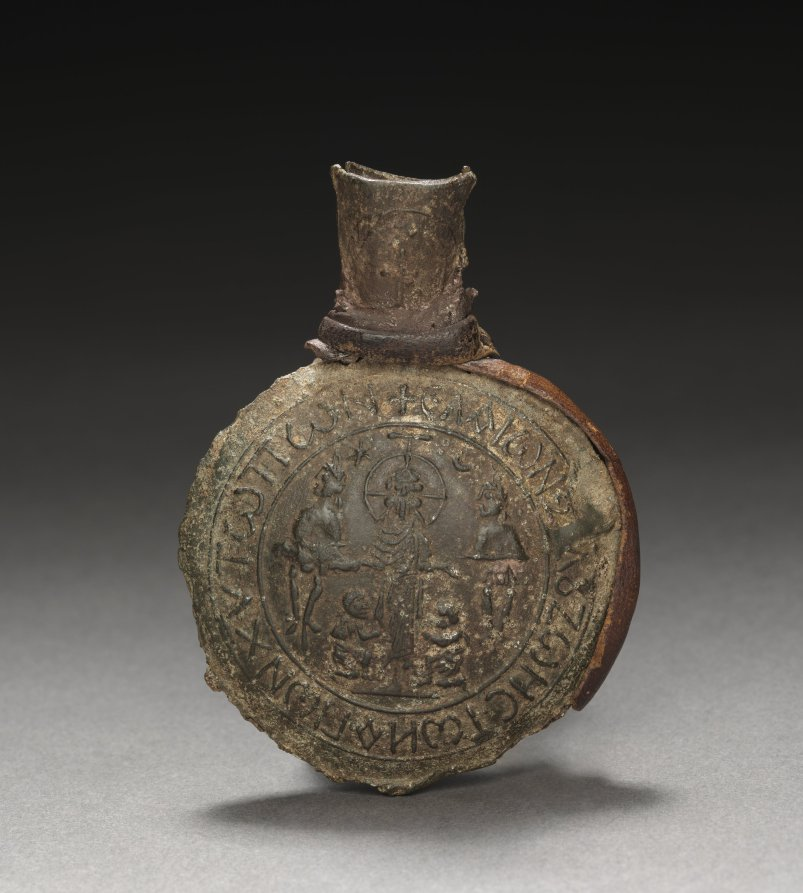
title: Pilgrim's Ampulla with the Crucifixion (front)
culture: Byzantium, Palestine, early Byzantine period, early 7th Century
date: c. 600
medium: tin-lead alloy with leather fragments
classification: Metalwork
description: The images found on the sides of surviving lead pilgrims' ampullae include scenes relating to the life of Christ, and by extension to the holy sites (loca sancta) where the events took place. Cast into the sides of this ampulla are scenes of Christ's Crucifixion on the front and the Ascension on the back. The use of such sacred images on these vessels illustrates the early Christian belief that images were carriers of divine power. This ampulla is known as a "Monza" or "Bobbio" type after caches of similar examples discovered in those two Italian towns.